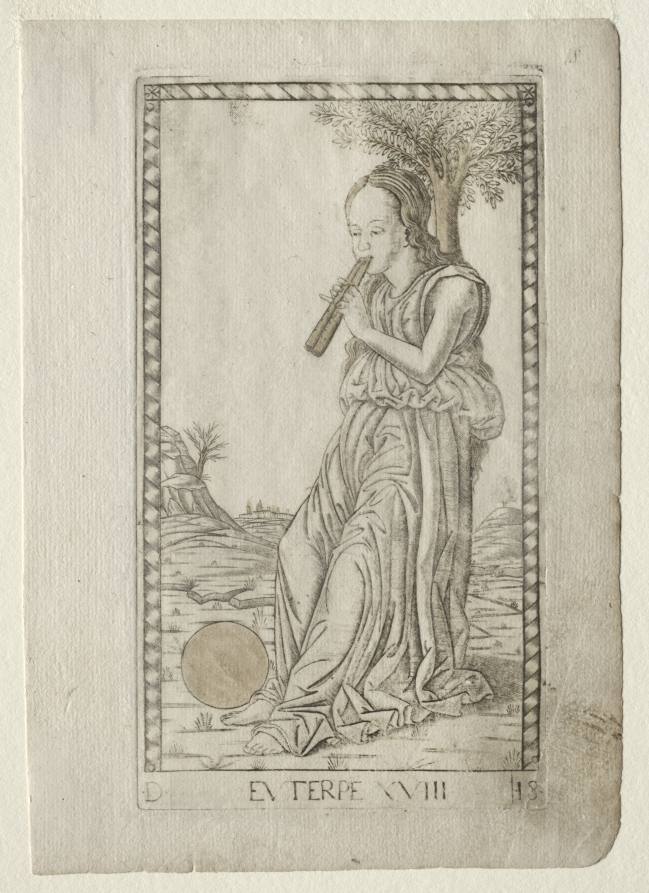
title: Euterpe (music, lyric poetry) (from the Tarocchi series D: Apollo and the Muses, #18)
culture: Italy, Ferrara, 15th century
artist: Master of the E-Series Tarocchi (Italian, active 1460s)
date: before 1467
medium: engraving hand-colored with gold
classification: Print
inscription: Lettered below the image of Euterpe: ·D· / ·EUTERPE ·XVIII· / ·18·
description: This engraving is part of the Tarocchi group marked with the letter “D”, and named Apollo and the Muses. In Greek mythology, the nine Muses (Calliope, Urania, Terpsichore, Erato, Polyhymnia, Thalia, Melpomene, Euterpe, and Clio) were the daughters of Zeus, king of the gods, and Mnemosyne, the Titaness of memory. The Muses were goddesses presiding over different branches of the arts and sciences. Their leader and supervisor was Apollo, the god of light, music, prophecy, and poetry. Here, Euterpe is personified as a full-length female figure, turned to left, and leaning against a tree set in an imaginary hilly landscape. She is playing an aulos, an ancient Greek instrument, similar to a flute. Euterpe was regarded as the Muse of music and lyric poetry.